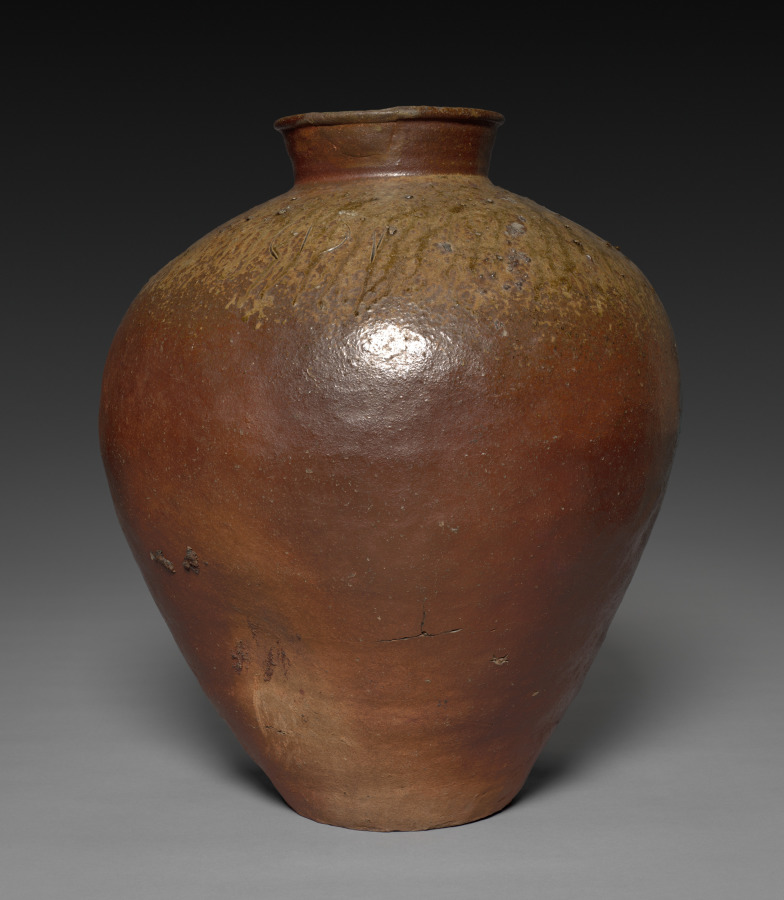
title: Storage Jar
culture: Japan, Muromachi period (1392–1573)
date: 1400s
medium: Stoneware with natural ash glaze (Echizen ware)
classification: Ceramic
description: Located in present-day Fukui prefecture northeast of Kyoto, the Echizen kilns produced ceramics with purplish-red skin flecked with white feldspar characteristic of the local clay used in this piece. Around 1700, the warm hue of Echizen wares gained popularity in tea practice, particularly when the vessels exhibited the rugged surface evident here in combination with the dynamic glossy glaze drips.